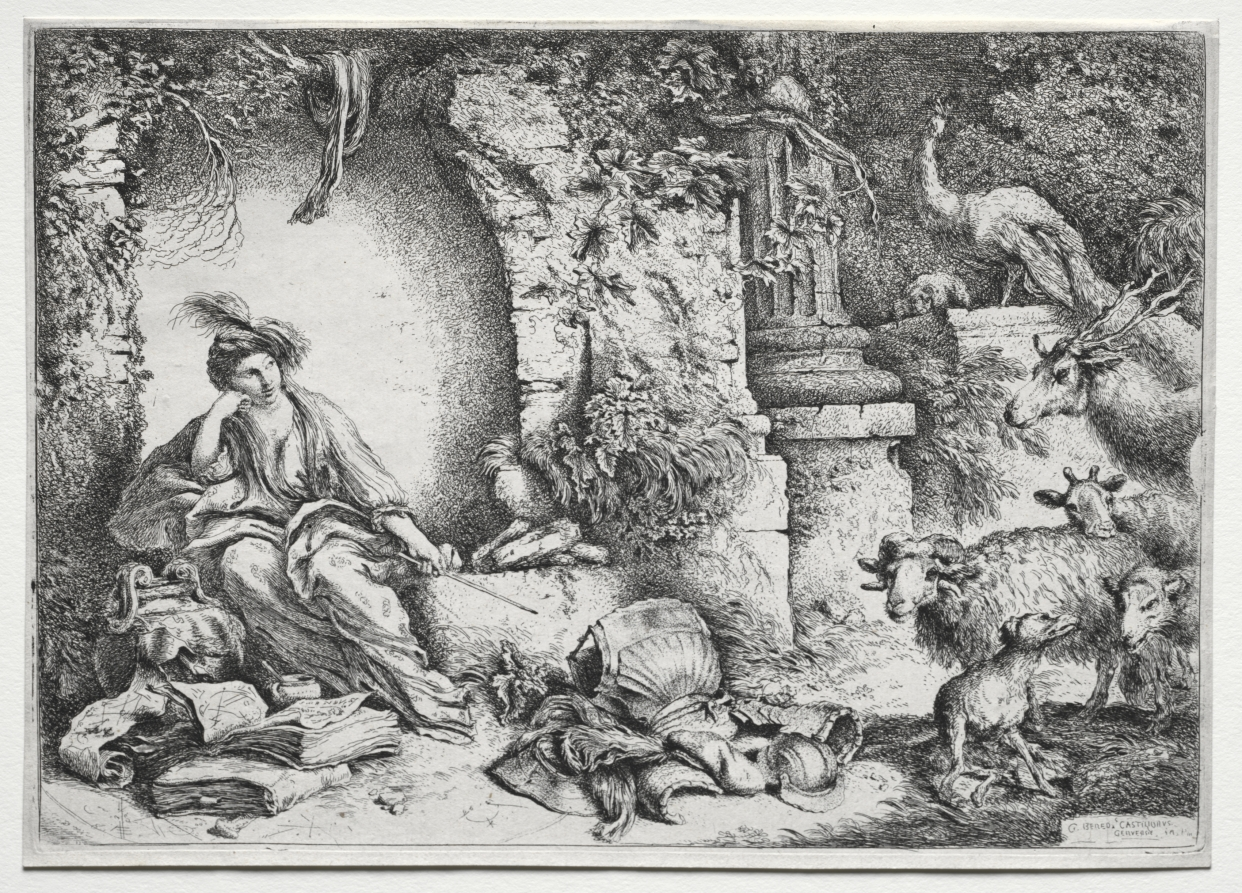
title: La Mèlancolie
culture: Italy, 17th century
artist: Giovanni Benedetto Castiglione (Italian, 1609–1664)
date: c. 1660–1665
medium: etching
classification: Print